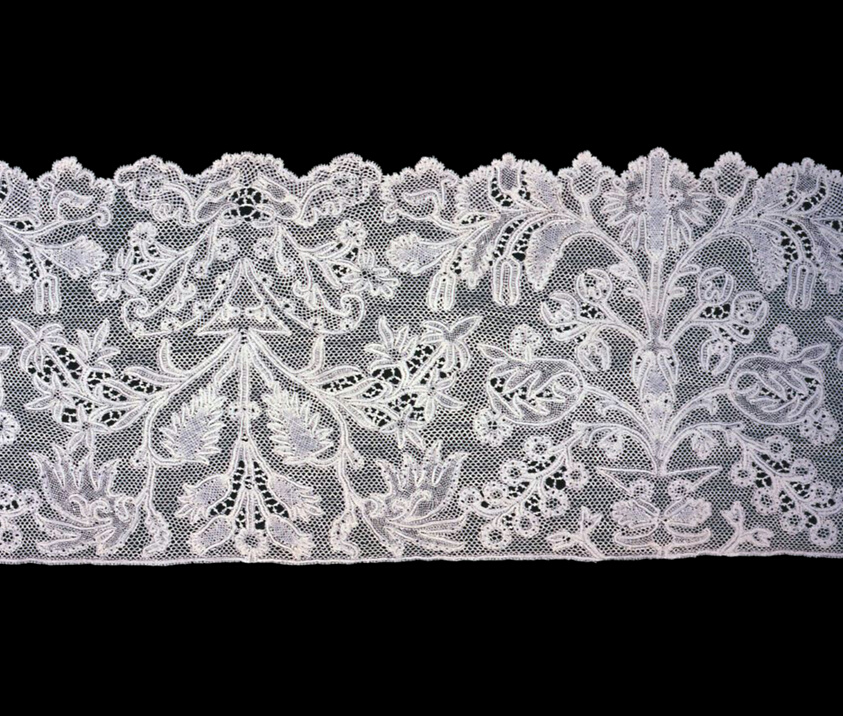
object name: Textile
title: Flounce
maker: Italy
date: 1775/1800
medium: Linen, bobbin part lace (made of continuous clothwork tapes)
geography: Italy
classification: textile; lace - bobbin